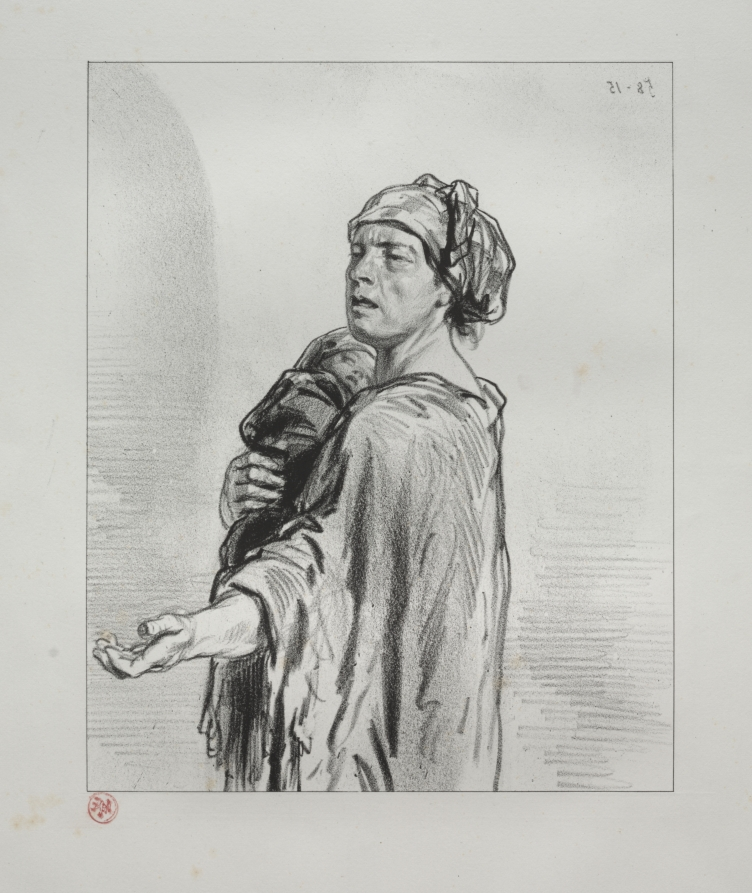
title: End of a Romance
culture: France, 19th century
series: Par-ci, par-lá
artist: Paul Gavarni (French, 1804–1866)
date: c. 1857–58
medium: lithograph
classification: Print